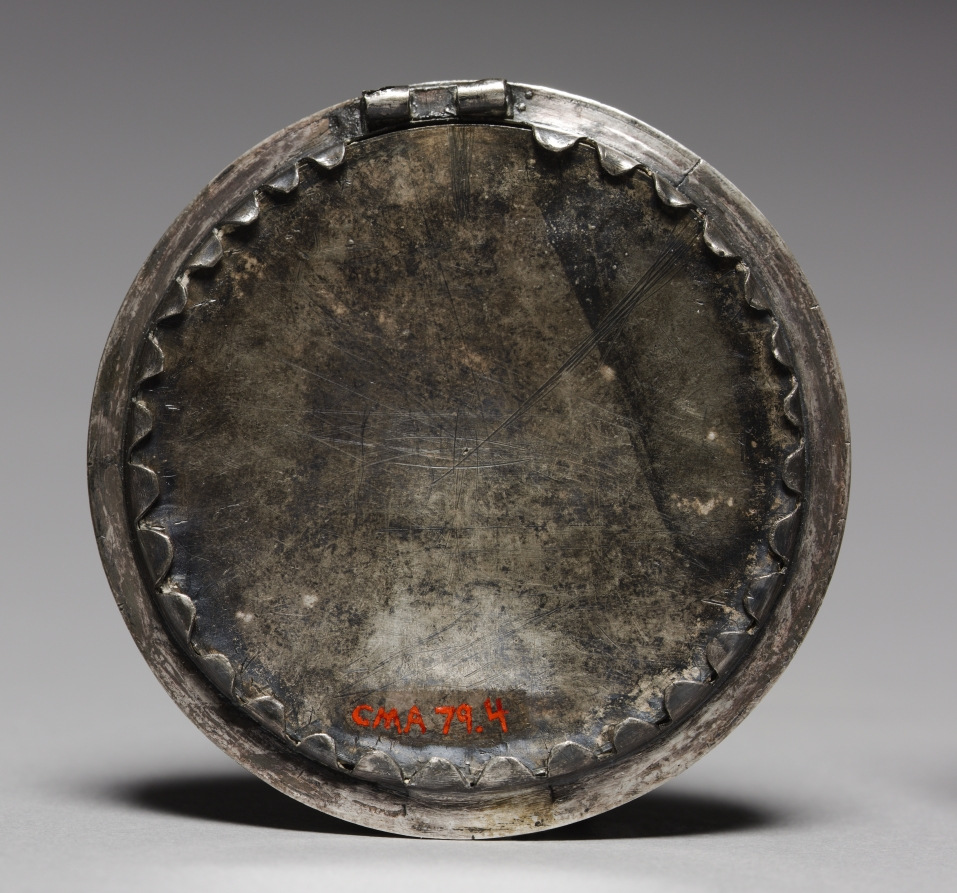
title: Medallion: Coronation of the Virgin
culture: France, 15th century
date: late 1400s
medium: basse-taille enamel on silver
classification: Enamel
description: The word enamel derives from the Old French esmail and the Old High German smelzen, meaning "to smelt." This is the most crucial process in the making of enamel. To prepare enamel, the constituents of glass (flint, or sand, as well as red lead, and soda or potash) are heated together to form a clear flux. To this a coloring agent (usually a metallic oxide) is added: copper for green, cobalt for blue, iron for red or brown. The enamel is then allowed to cool and solidify in slabs. Before use, each color is separately ground into a fine powder, placed on a prepared metal surface, and fired in a kiln. When cool, the surface is polished to remove any imperfections and add brilliance to the colors. The difference between the various enameling techniques lies chiefly in the methods used to prepare the metal surface for the enamel.